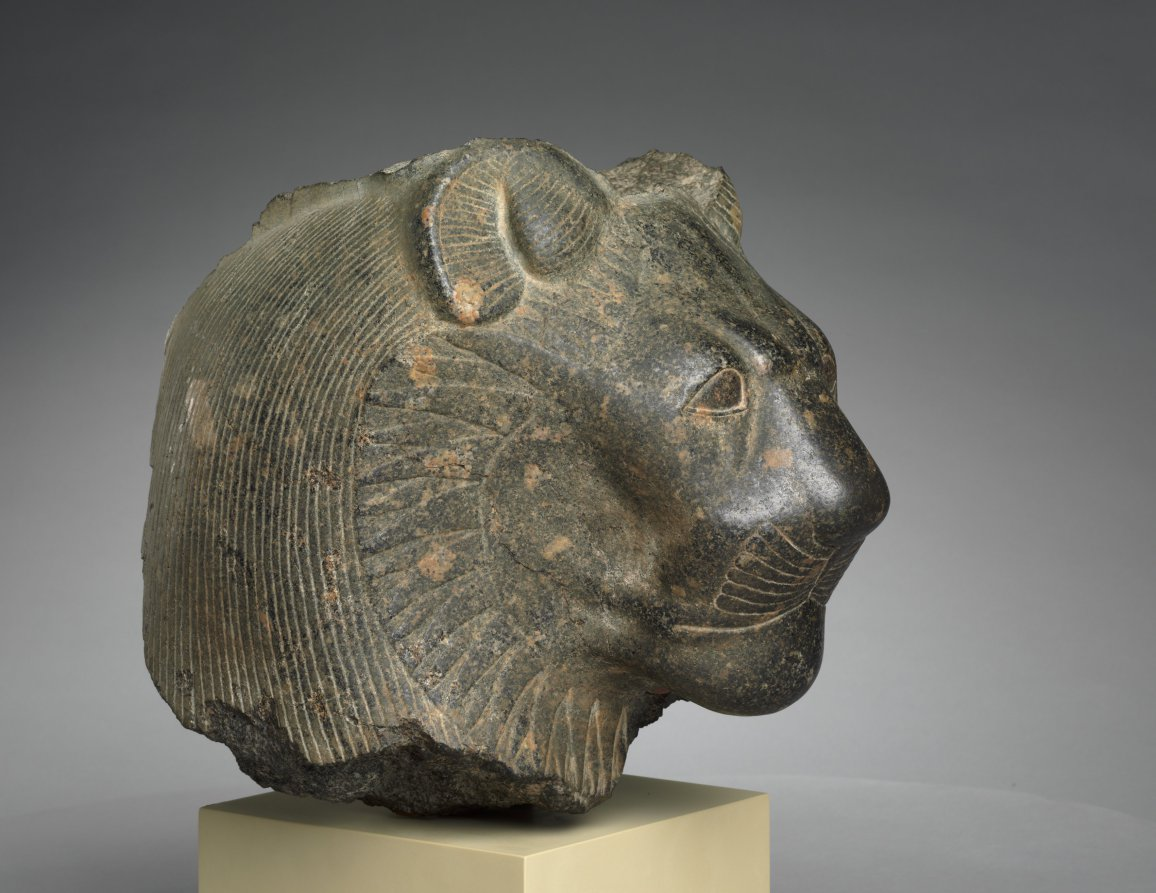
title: Head of Sekhmet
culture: Egypt, Thebes(?), New Kingdom (1540–1069 BCE), Dynasty 18, reign of Amenhotep III (1390–1352 BCE)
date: c. 1391–1353 BCE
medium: granodiorite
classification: Sculpture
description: This lioness head once belonged to a grand statue of the goddess Sekhmet, "the powerful one," probably seated and wearing a tight dress. Possibly appealing to her healing aspect, Pharaoh Amenhotep III, often described as “beloved of Sekhmet,” commissioned and dedicated hundreds of large granodiorite Sekhmet sculptures in his Theban mortuary temple. Thus, this head likely comes from Thebes, perhaps later moved across the Nile—like many such sculptures—to the temple of Mut, a related deity, at Karnak. Behind her stylized ruff, Sekhmet wears a wig, once crowned with a sun disk and uraeus, the stylized cobra symbolizing royal or divine power.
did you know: Amenhotep III may have dedicated 730 statues of Sekhmet, two for each day of the year.